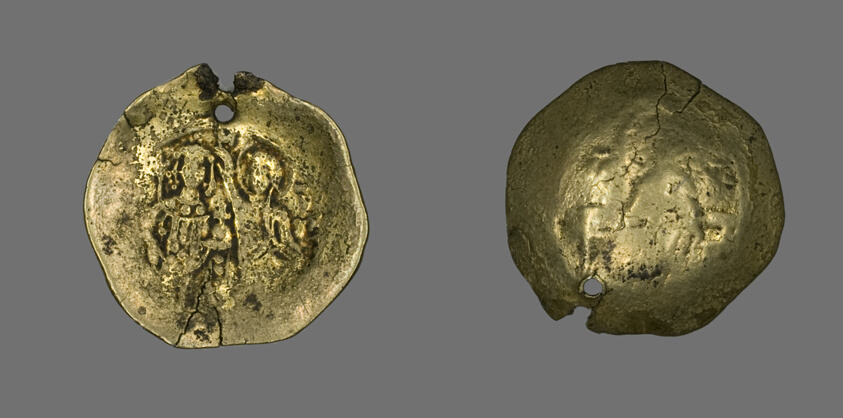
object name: Coin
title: Hyperpyron (Coin) of John II Comnenus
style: byzantine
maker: Byzantine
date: 1118-1143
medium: Gold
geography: Greece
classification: coin; ancient art